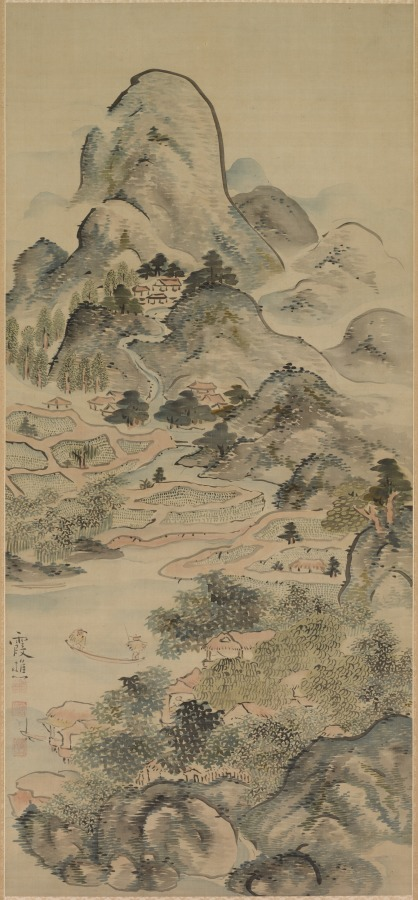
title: Fishing in Springtime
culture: Japan, Edo period (1615–1868)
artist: Ike Taiga (Japanese, 1723–1776)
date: 1700s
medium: Hanging scroll; ink and color on silk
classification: Painting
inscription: Signature: 霞樵, transliteration, Kashō; seals: 池無名印, transliteration, Ike Mumei in; 三岳道者, transliteration, Sangaku Dōja; 遵生, transliteration, Junsei.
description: Ike Taiga was subject to many artistic influences; we know he practiced Zen calligraphy from an early age, his father may have had ties to the famous painter Ōgata Kōrin (1658–1716), he may have trained under a Tosa school painter, and he is thought to have seen Western images early on that informed his approach in representing depth. Though he started with professional beginnings—making a living after his father’s death by selling paintings on fans—he surrounded himself with the members of the literati community, and never stopped absorbing stylistic influences from diverse sources throughout his career. As a result, his style is unique and aesthetically definitive of nanga—the name given to Japanese literati painting.